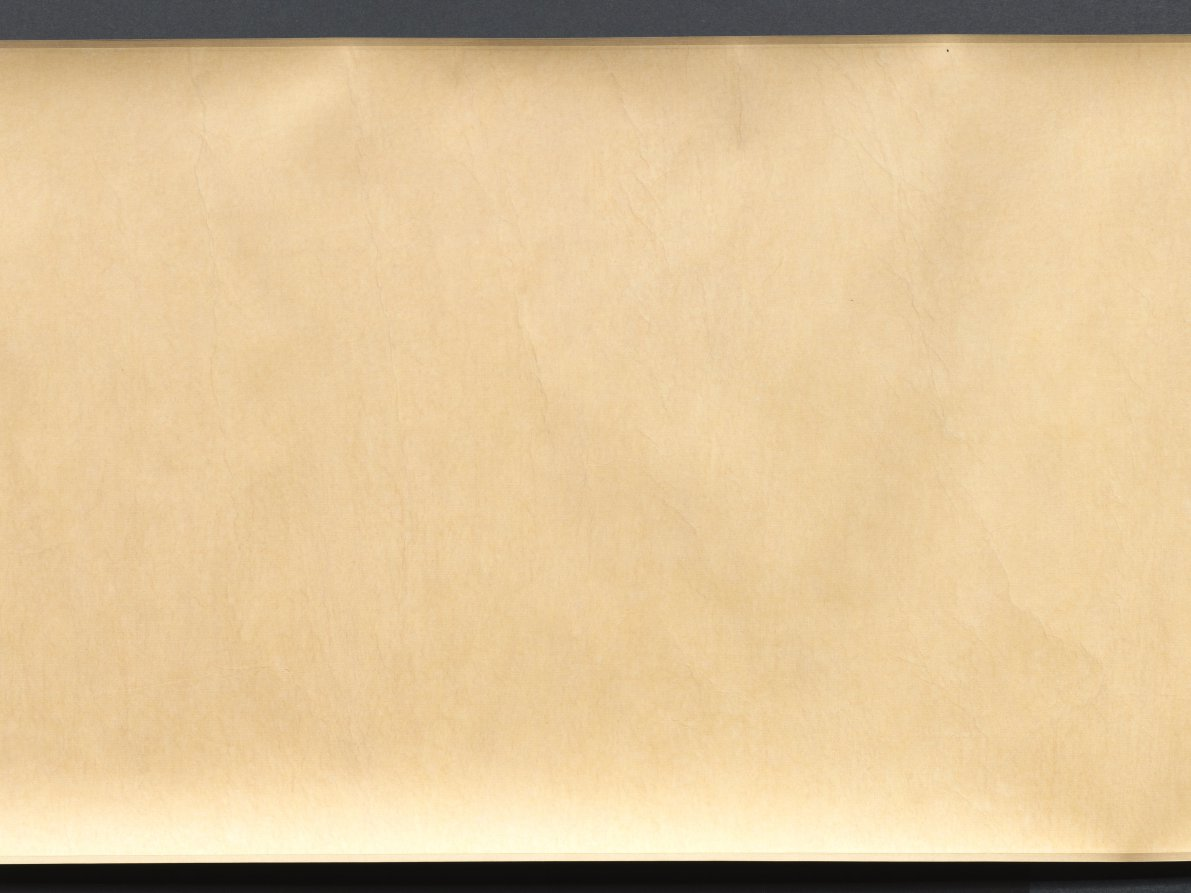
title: Calligraphy in Running Style based on Wang Bo's Essay on Tengwang Pavilion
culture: China, Changbai, Qing dynasty (1644-1911)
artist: Tiebao (Chinese, 1752–1824)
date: 1811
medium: handscroll, ink on paper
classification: Calligraphy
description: A member of the Donggo clan, Tiebao belonged to the Manchu Plain Yellow Banner army. As an official in the Qing court, he endured considerable vicissitude and his career was never smooth. Celebrated as a man of letters, he oversaw the publications of the Manchu military system as well as an anthology of poems by members of the imperial family and other Manchu dignitaries. In calligraphy, he was regarded as the equal of such eighteenth-century luminaries as Liu Yong (1720-1805) and Weng Fanggang (1733-1818). This handscroll is a work of his mature years and is exemplary of his disciplined and highly subtle approach to the art of calligraphy.